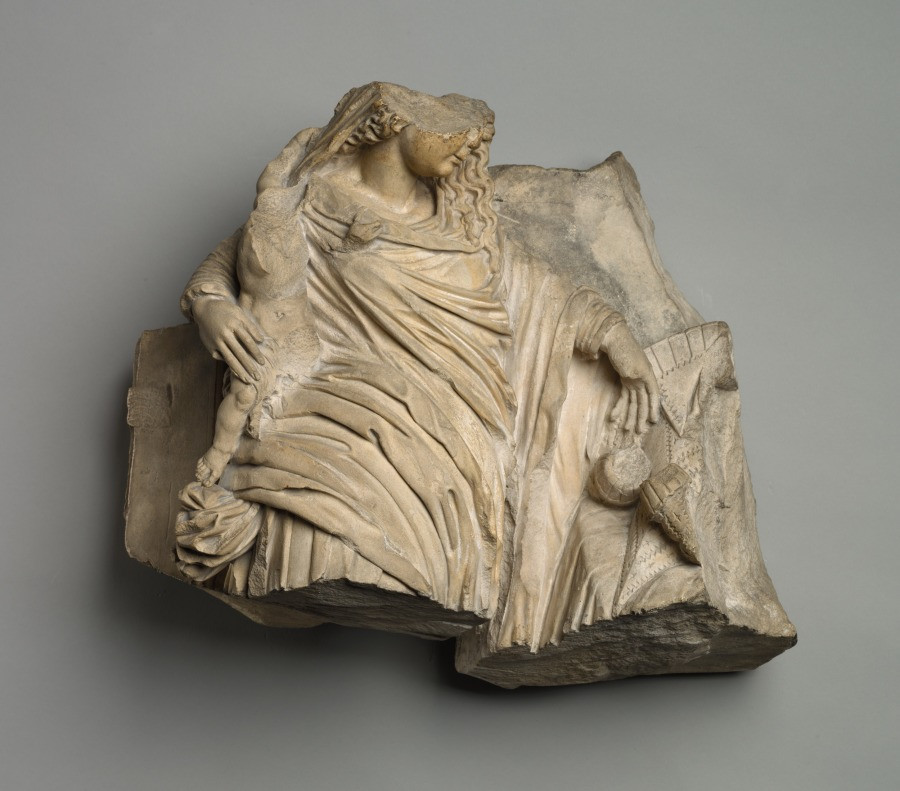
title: Fragment of a Female Figure with Child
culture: France, School of Troyes, 16th century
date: early 1500s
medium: stone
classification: Sculpture